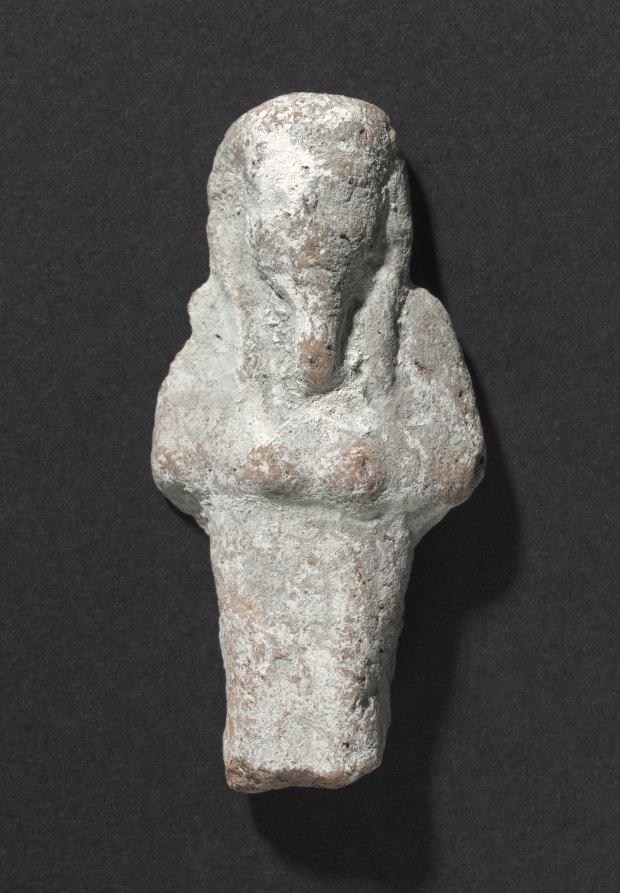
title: Shawabty of Ditamenpaankh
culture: Egypt, Late period (715–332 BCE), Dynasty 25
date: 715–656 BCE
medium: terracotta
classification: Funerary Equipment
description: High demand for shawabtys in the Late Period, a time when as many as 400 or more shawabtys were placed in the tomb with the deceased, gave rise to a specialized container for storing them: the shawabty box. This example is inscribed for the lady of the house, Ditamenpaankh, and was probably one of a pair originally made for her. The single-masted boat on the box's lid is perhaps an allusion to the pilgrimage of the deceased to the holy city of Abydos, the cult city of Osiris, king of the dead. The shawabtys inside are crude, mass-produced examples cast in an open mold. Made of terracotta, their blue paint imitates more costly shawabtys made of faience. As for the shawabty spell, it has been removed from its traditional location on the shawabty's front and relocated onto the sides of box, where it needed only to be written once, thus expediting production.